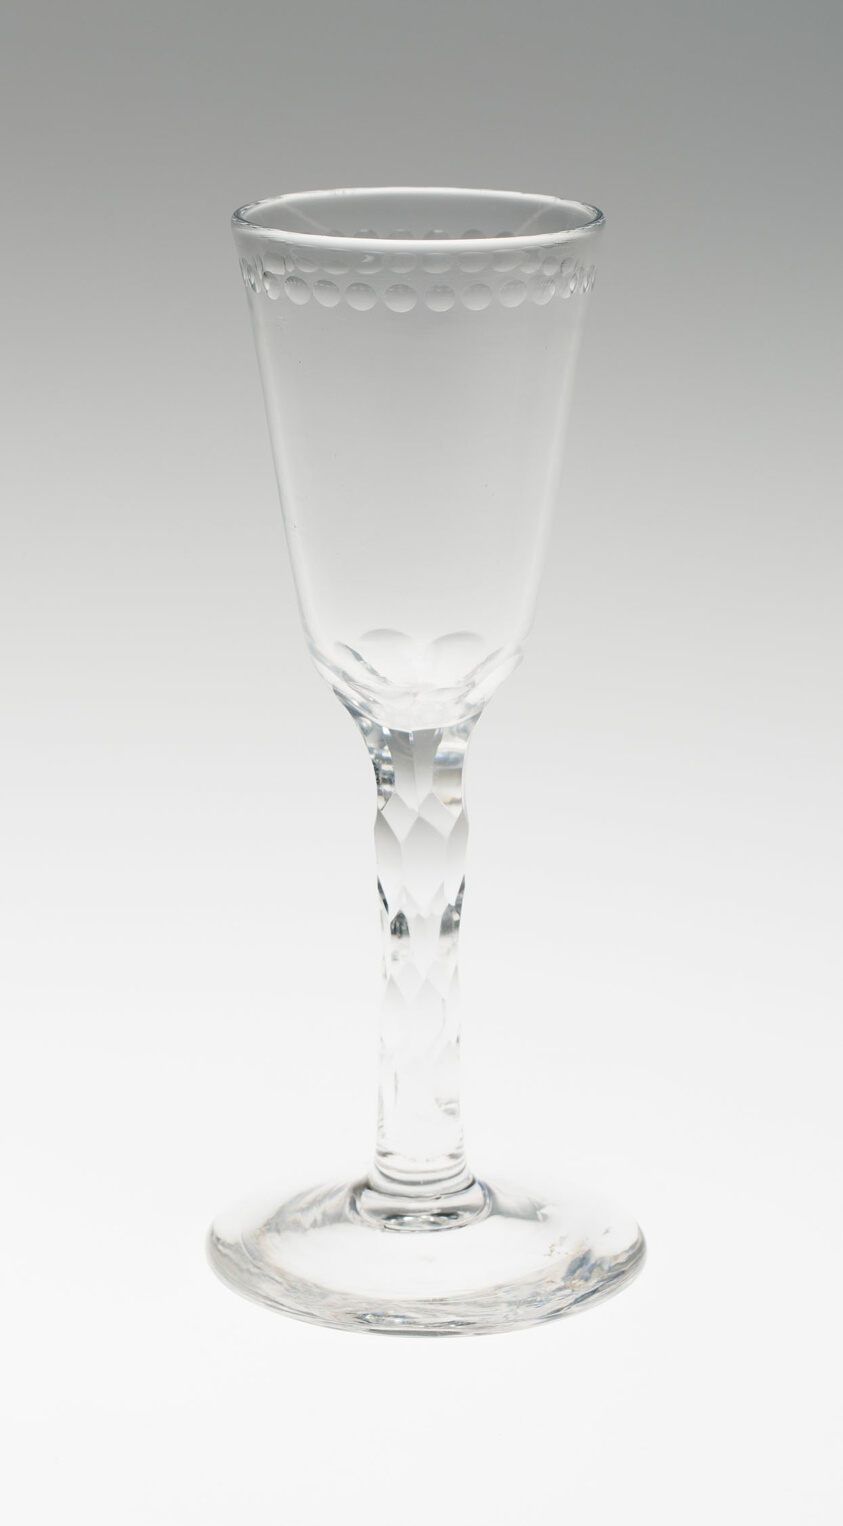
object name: Glass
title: Ale Glass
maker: England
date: c. 1780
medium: Glass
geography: England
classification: drinking vessel; glass